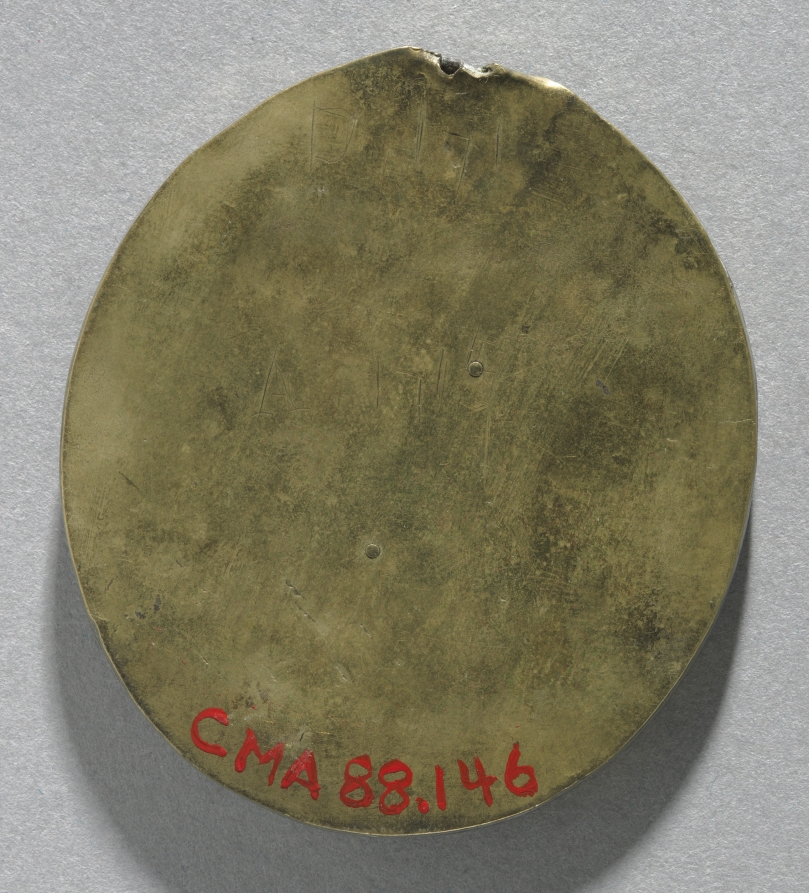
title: Portrait of Archduke Charles of Styria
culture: Austria or South Germany, 16th century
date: c. 1564–70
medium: silver, gilt silver, and gilt copper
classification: Sculpture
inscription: raised sword inscribed with: AVDASES ° FORTVNA ° IVVAT (Fortune assists the brave), the personal motto of Archduke Charles of Syria.